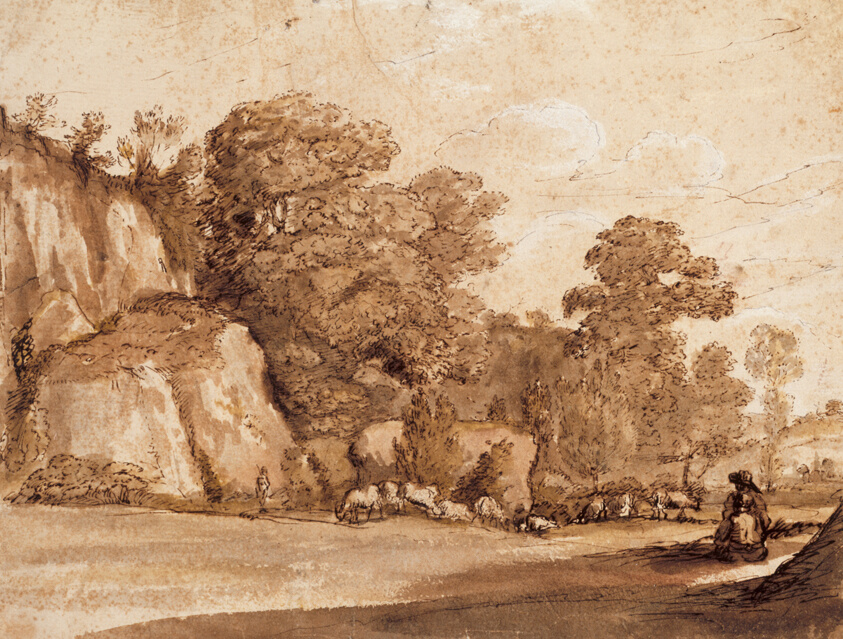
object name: Drawing and Watercolor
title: A Rocky Hillside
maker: Claude Lorrain (French, 1600-1682)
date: 1635/1636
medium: Pen and brown ink, brush with brown, pink, and green wash, heightened with white gouache, over traces of red chalk, on cream laid paper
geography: France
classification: ink or chalk wash; drawings (visual works); prints and drawing